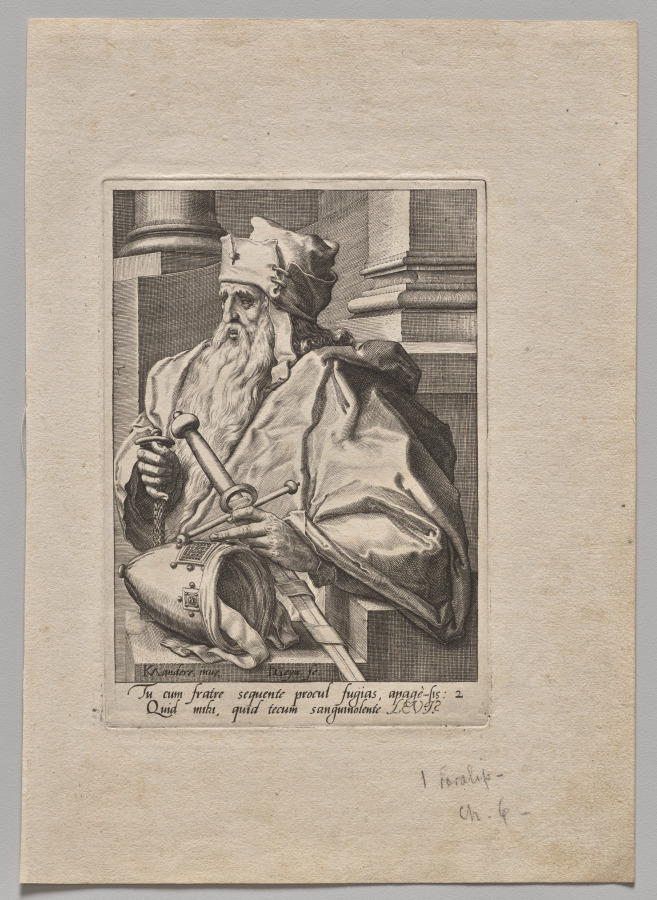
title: Plate 2: Levi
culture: Netherlands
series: The Twelve Sons of Jacob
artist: Jacob de Gheyn II (Netherlandish, 1565–1629)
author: after Karel I van Mander (Netherlandish, 1548–1606)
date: c. 1589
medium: engraving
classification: Print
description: In this print, the biblical figure Levi holds a sword next to a bishop’s mitre, denoting his tribe’s association with the priesthood. This is one of a series of prints depicting the twelve sons of Jacob, each with an attribute and costume that denotes his character. According to the Old Testament, Jacob blessed each of his twelve sons, prophesizing the destiny of their tribe, and assigning them a parcel of land in Canaan (present-day Israel). The print series was made in the Netherlands in the late 16th century, a time of political struggle when Old Testament heroes were popular exemplars of fortitude and patience.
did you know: The columnar architecture behind this Old Testament figure suggests the future of his tribe as members of the priesthood.